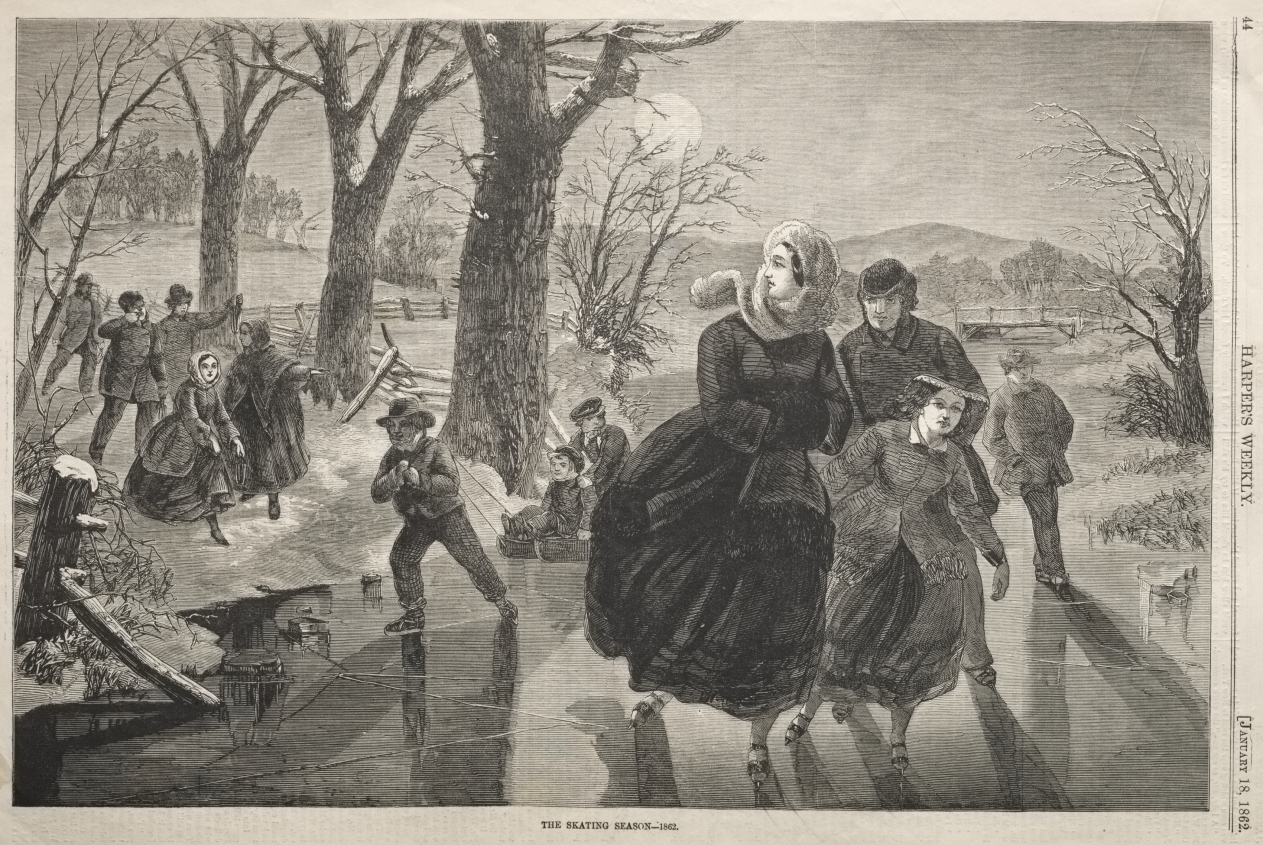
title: The Skating Season - 1862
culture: America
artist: Winslow Homer (American, 1836–1910)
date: 1862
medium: wood engraving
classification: Print